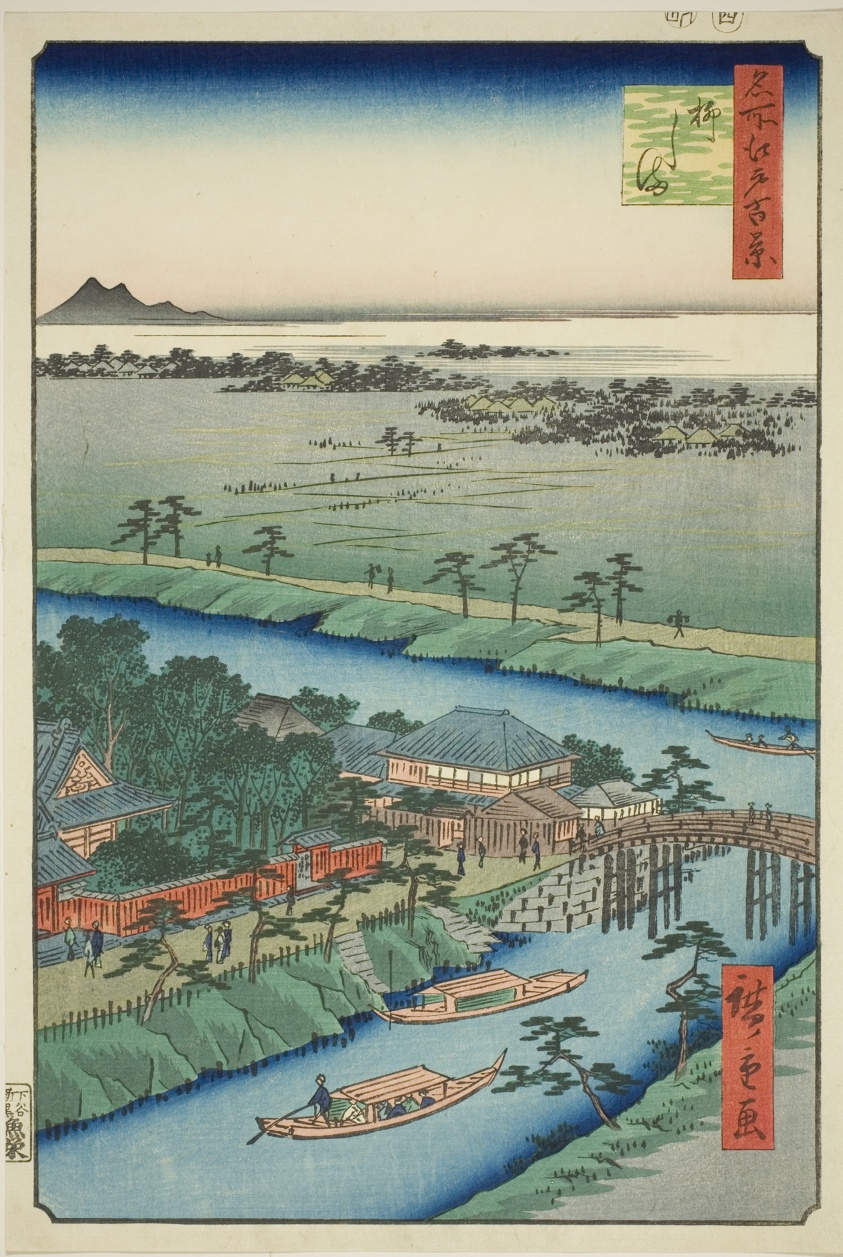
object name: Print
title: Yanagishima, from the series "One Hundred Famous Views of Edo (Meisho Edo hyakkei)"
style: Japanese (culture or style)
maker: Utagawa Hiroshige 歌川 広重; Japanese, 1797-1858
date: 1857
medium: Color woodblock print; oban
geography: Japan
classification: woodblock print; print; asian art